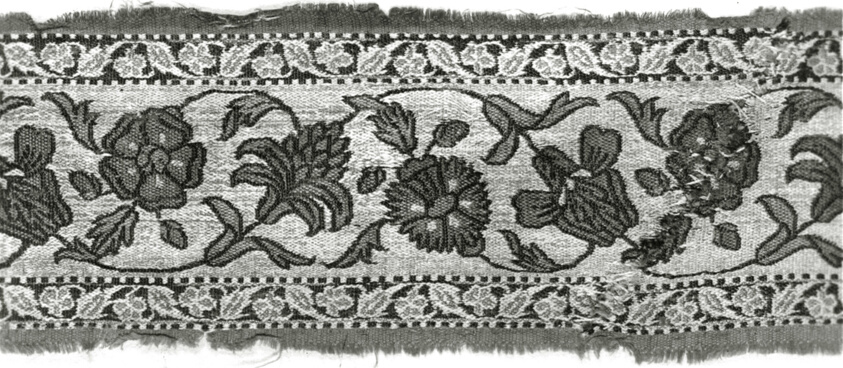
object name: Textile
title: Fragment (Border)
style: isfahan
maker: Iran (Persia, Isfahan)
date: 17th century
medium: Brocaded compound cloth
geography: Iran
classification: textile; weaving